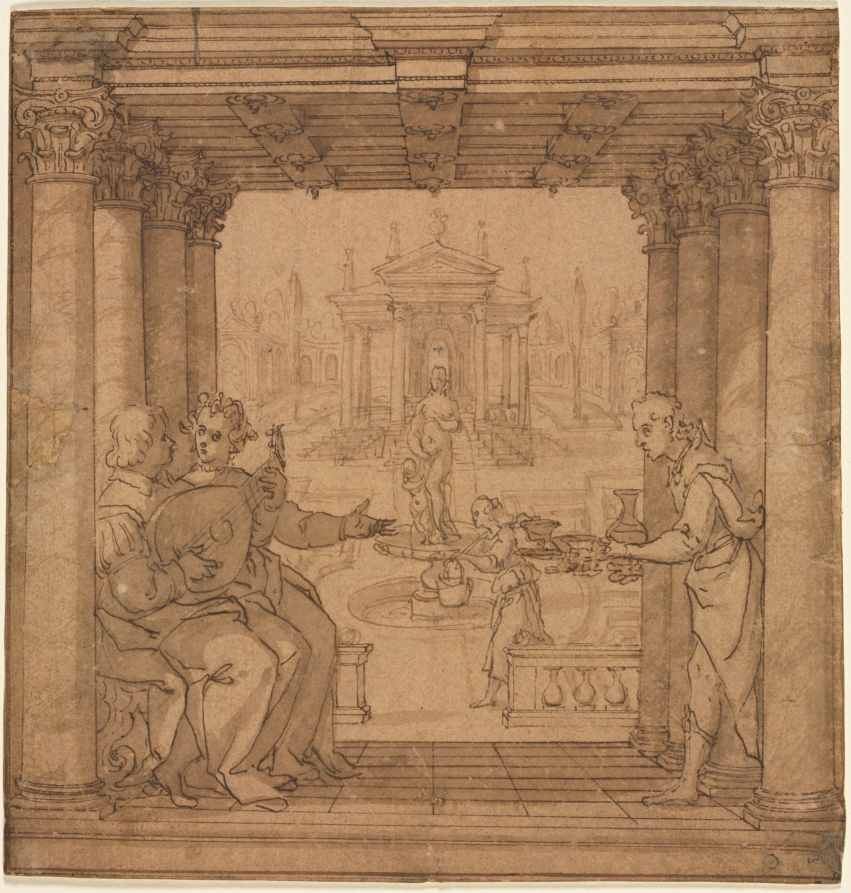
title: Illustration from Torquato Tasso's Gerusalemme Liberata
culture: Italy, 16th century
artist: Bernardo Castello (Italian, 1557–1629)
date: 1586–90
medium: pen and brown ink and brush and brown wash with traces of graphite; framing lines in brown ink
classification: Drawing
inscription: VERSO OF SECONDARY SUPPORT, lower center, in graphite: Mariette's [colln?] [crossed out] / circular mark - Lugt No. 2925 / unidentified.